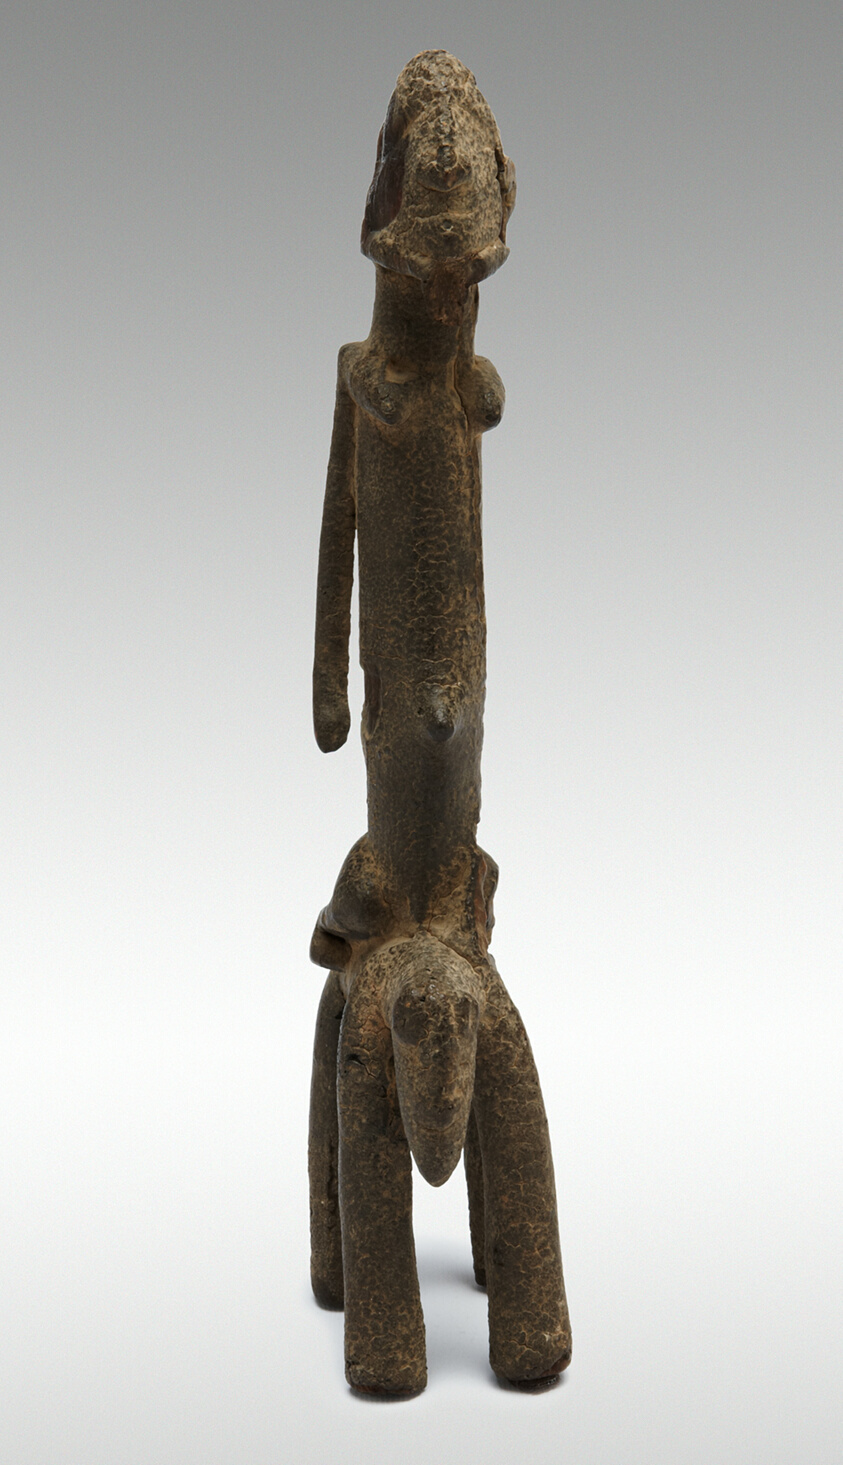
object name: Sculpture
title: Equestrian Figure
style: dogon, Arts of Africa, african Art, tellem, Northern Africa and the Sahel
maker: Dogon or Tellem; Bandiagara region, Mali; Northern Africa and the Sahel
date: 16th/19th century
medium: Wood and sacrificial material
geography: Mali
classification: sculpture; wood; arts of Africa; african art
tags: equestrian, animals, rider, horse